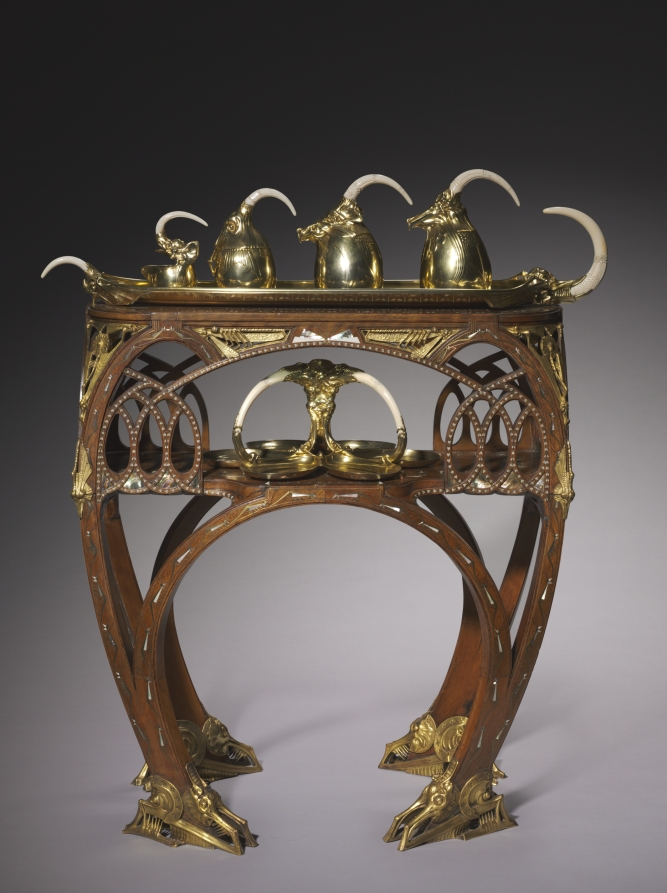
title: Salver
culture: France, Paris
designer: Carlo Bugatti (Italian, 1856–1940)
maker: Adrien-Aurélien Hebrard (French, 1866–1937)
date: c. 1907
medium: Gilt silver and ivory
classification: Silver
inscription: inscribed inside one of six ovoid compartments: "Bugatti" in ligature. Engraved on back: A.A. HEBRAND/ 8 RUE ROYAL/PARIS FRANCE.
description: This tea and coffee service, salver, and table, together with some now missing cups, were all designed by Carlo Bugatti as an ensemble and presented at the 1902 exposition devoted to decorative arts in Turin, Italy. The set was probably acquired from Bugatti's 1907 exhibition at the Galerie Hébrard in Paris by a wealthy South African widow, Anna Blake, who was living there at the time. Some of the animal and insect motifs suggest mythical beasts or the fossils of prehistoric animals. When Mrs. Blake returned to Cape Town, she took these and other pieces designed by Bugatti with her, and they remained in South Africa throughout her lifetime.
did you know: Carlo Bugatti's sons achieved illustrious careers of their own. Rembrandt Bugatti (1884-1916) became a celebrated sculptor, and Ettore Bugatti (1881-1947) manufactured luxurious automobiles and racing cars.